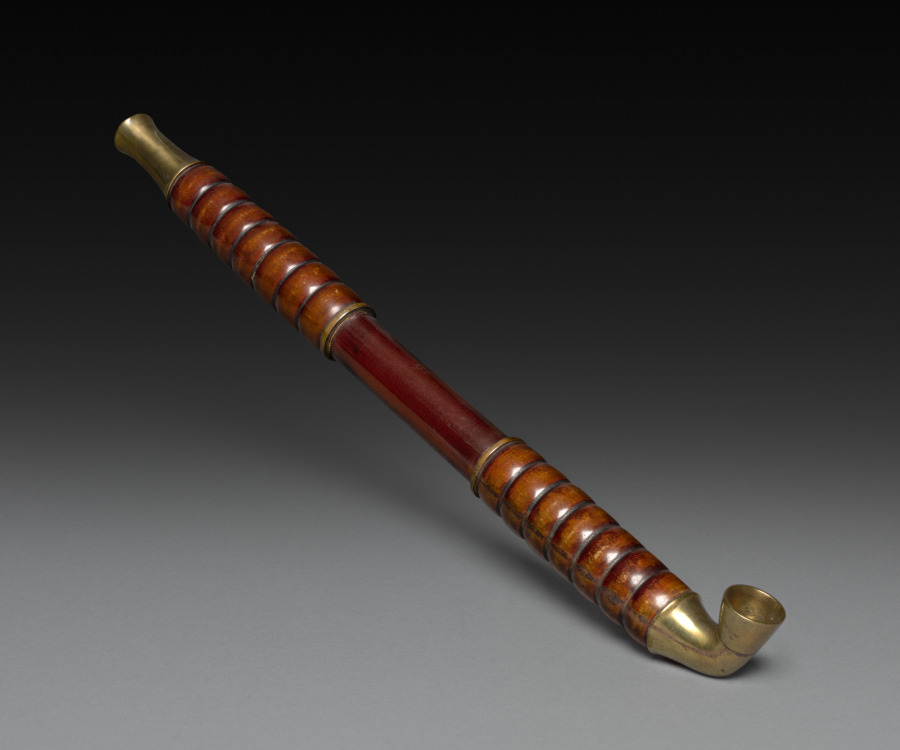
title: Tobacco Pipe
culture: Japan, Edo period (1615–1868)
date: early to mid-1800s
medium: bamboo, metal, and brass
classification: Miscellaneous